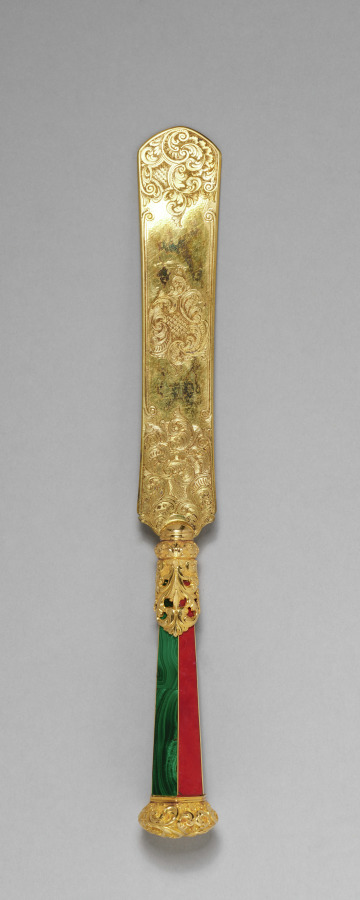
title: Paper Knife from a Writing Set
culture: England, mid-19th century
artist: John Hamilton Mortimer (British, 1740–1779)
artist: and Paul Storr (British, 1771–1844)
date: c. 1830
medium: hardstones including lapis lazuli, malachite, carnelian, agate, gold; original fitted velvet-lined case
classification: Miscellaneous